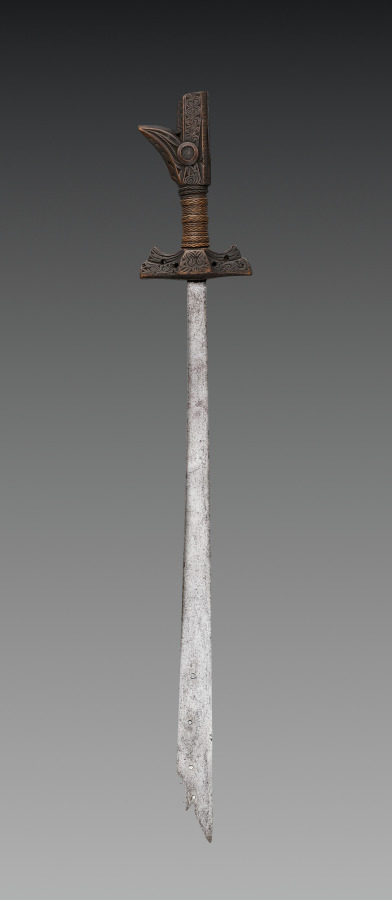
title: Sword (Kampilan)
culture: Philippines, Mindanao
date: before 1916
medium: Blade: forged steel; handle: wood with braided cane cord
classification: Arms and Armor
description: This sword features a long, straight, single-edged steel blade that widens near the tip. The hilt is carved from dark hardwood and takes the shape of a stylized zoomorphic figure, possibly a bird, buwaya (crocodile), or naga. The materials, carving style, and blade form correspond to kampilan-type swords made among the Maranao and Maguindanao people of northern and central Mindanao.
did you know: The kampilan was both a functional weapon and a symbol of warrior status.